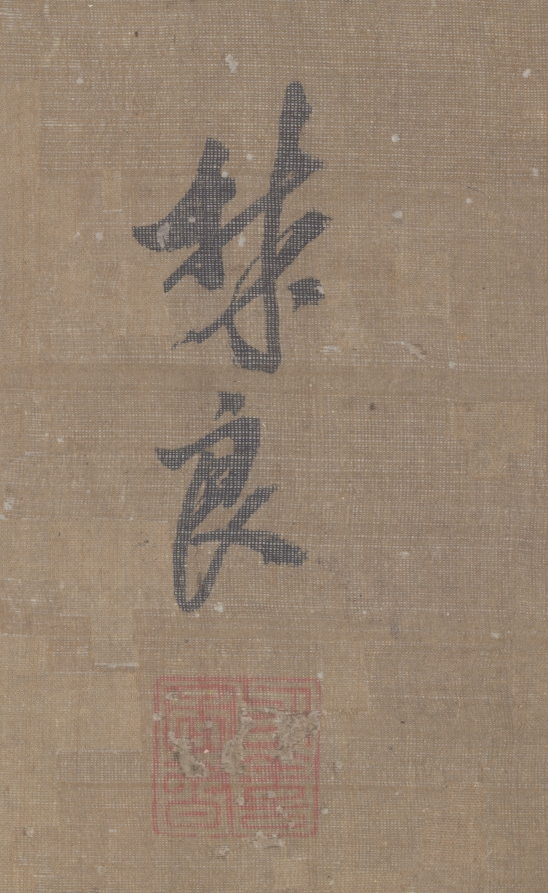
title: A Pair of Peafowl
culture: China, Ming dynasty (1368–1644)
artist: Lin Liang (Chinese, 1416–1480)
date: late 1400s-early 1500s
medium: hanging scroll, ink on silk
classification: Painting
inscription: 林良. [印] 以善圖書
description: The peacock, identified by the flamboyant tail, is paired with a female peahen to its right. In lowering her head, the hen seems to show respect to the male peacock. With his articulate brushstrokes and strong contrasting tones, Lin Liang’s representation in black ink appears as vivid as Yin Hong’s colorful peacock (1974.31). The painter skillfully uses wet and dry ink as well as broad and thin washes to represent the plumage of the bird. The surface of the rocks, depicted in powerful sweeping strokes, recalls the landscape painting style of the Zhe School, which specialized in expressive brushwork.